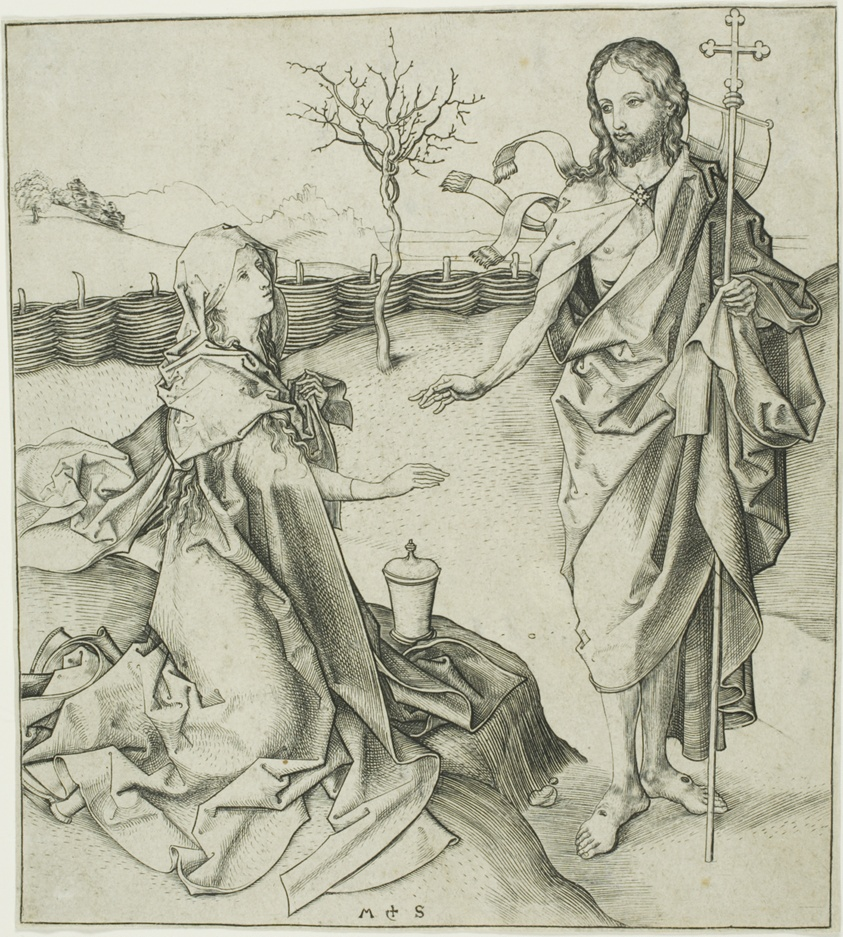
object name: Print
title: Christ Appearing to the Magdalen—Noli Me Tangere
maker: Martin Schongauer (German, c. 1430/50-1491)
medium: Engraving on paper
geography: Germany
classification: engraving; print; prints and drawing